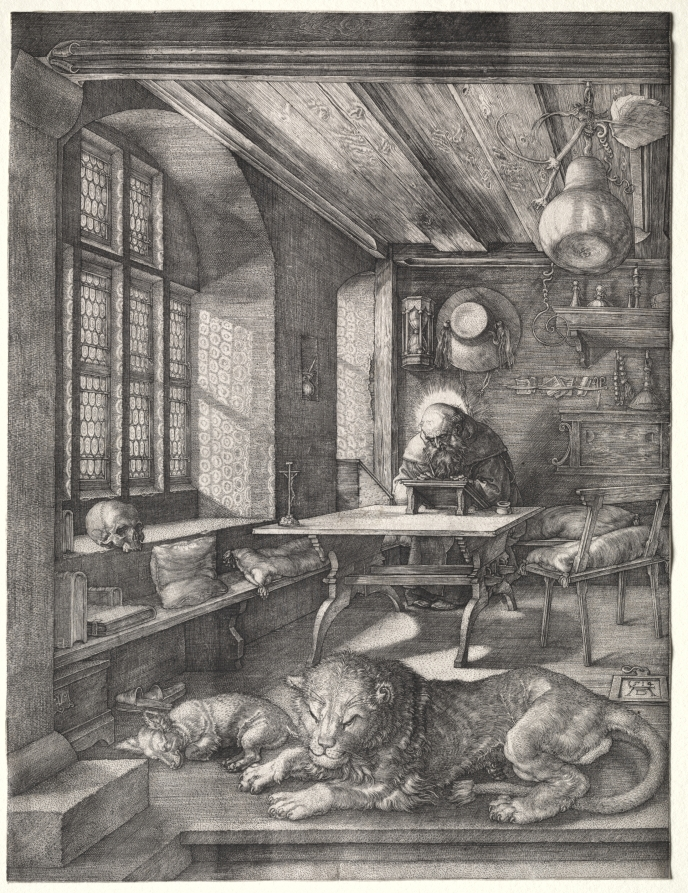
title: St. Jerome in His Study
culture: Germany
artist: Albrecht Dürer (German, 1471–1528)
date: 1514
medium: engraving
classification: Print